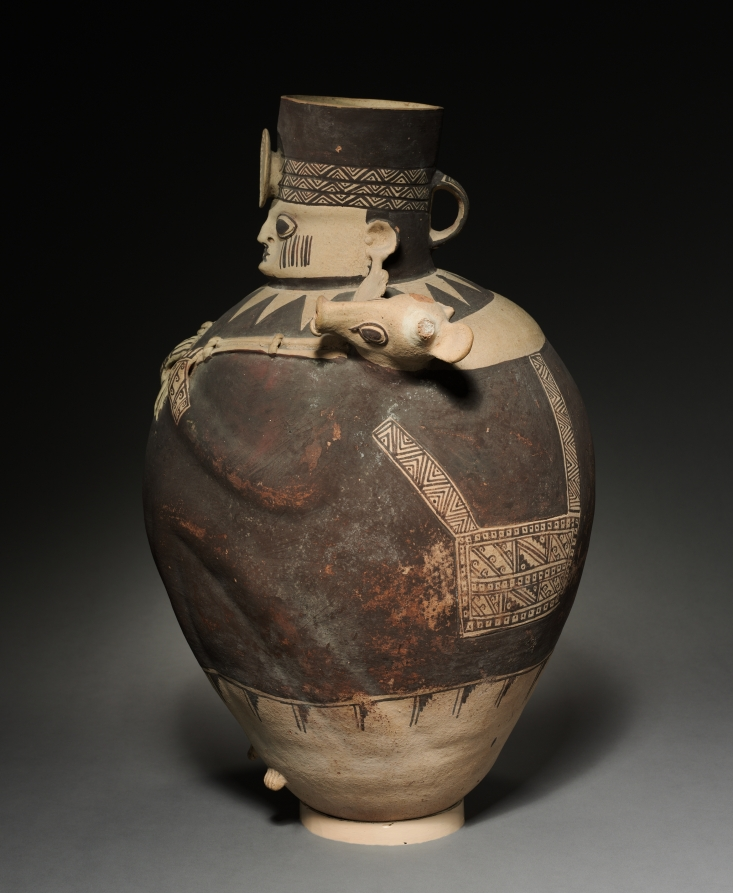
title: Vessel in the Shape of a Figure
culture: Peru, Central Coast, Chancay sytle, 12th-15th century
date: 1000–1460s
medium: earthenware with painted slip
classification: Ceramic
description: This seated figure carries a stag over his shoulders, its antlers now missing and its tongue lolling out in death. That the stag is destined for more than dinner is suggested by the human's pursed lips--perhaps the kiss-like expression of reverence that the later Inka made when approaching a sacred shrine. The animal, then, may be an offering. The two bags painted on the figure's back may be for coca leaves, also very important for rituals. In comparison to earlier ceramics, the Chancay style seems less fine both artistically and technically. yet as this vessel proves, the best Chancay ceramics have appealing charm, in part because of their bold brown-on-white color scheme.